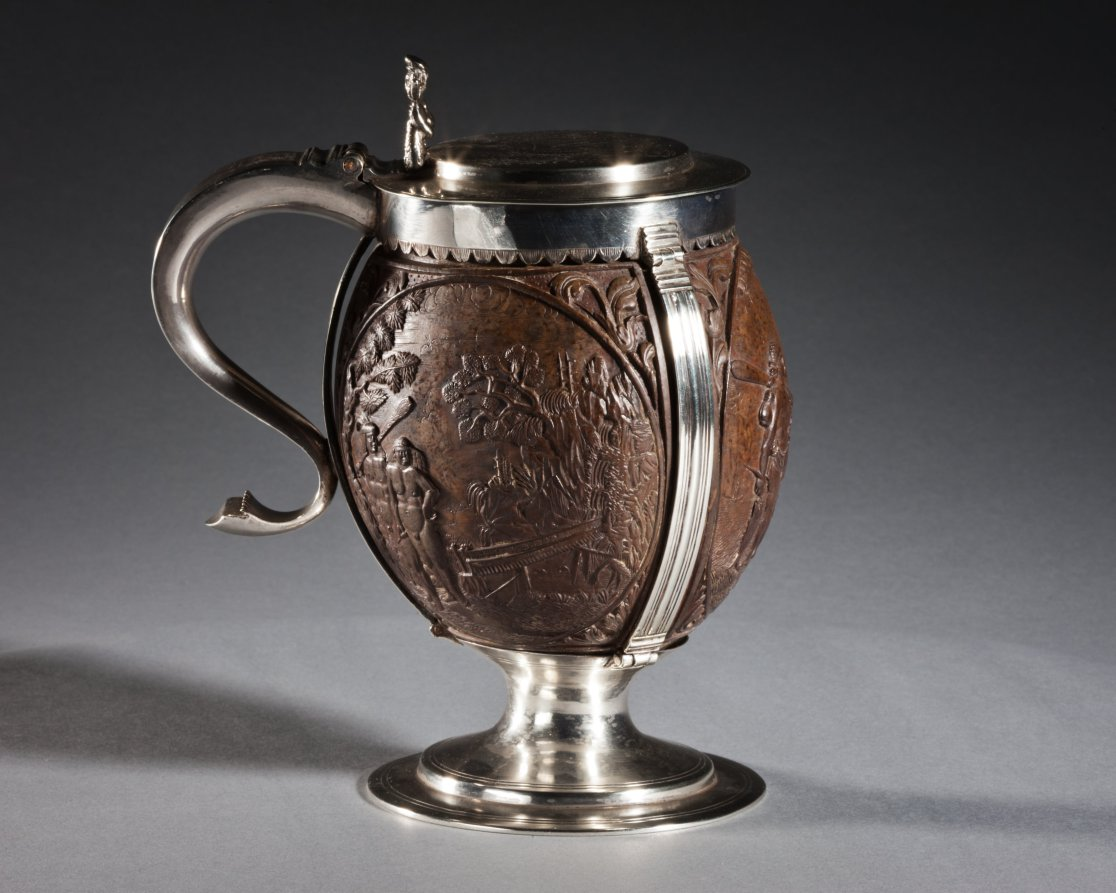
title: Coconut Cup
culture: carved coconut, probably The Netherlands; silver mount, probably England, 17th century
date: c. 1630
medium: carved coconut in silver mount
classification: Metalwork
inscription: top lid has engraved coat-of-arms, underside of lid has inscription: George Lewis TIVERTON Feby, 1st 1760.